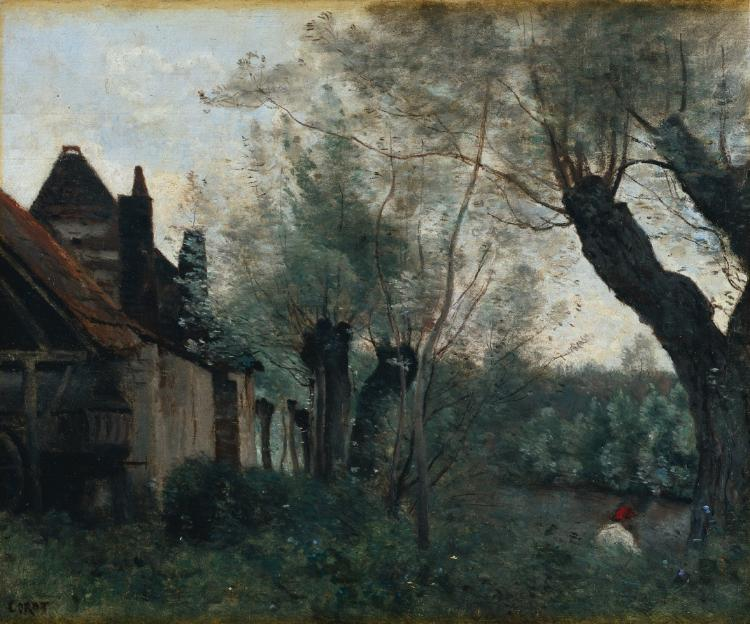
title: Willows and Farmhouse at Sainte-Catherine-lès-Arras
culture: France, 19th century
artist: Jean Baptiste Camille Corot (French, 1796–1875)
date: 1871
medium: oil on fabric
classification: Painting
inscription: Signed lower left: corot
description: With its quiet water and sky, fluffy trees, and other foliage flecked with light, this picture exemplifies the style that won Corot success with a wide public. It was painted during the artist's stay at Arras (about 100 miles north of Paris) in 1871.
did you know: Corot began his career as a draper and his exposure to the colors and textures of fabrics helped him develop an astute aesthetic sense.